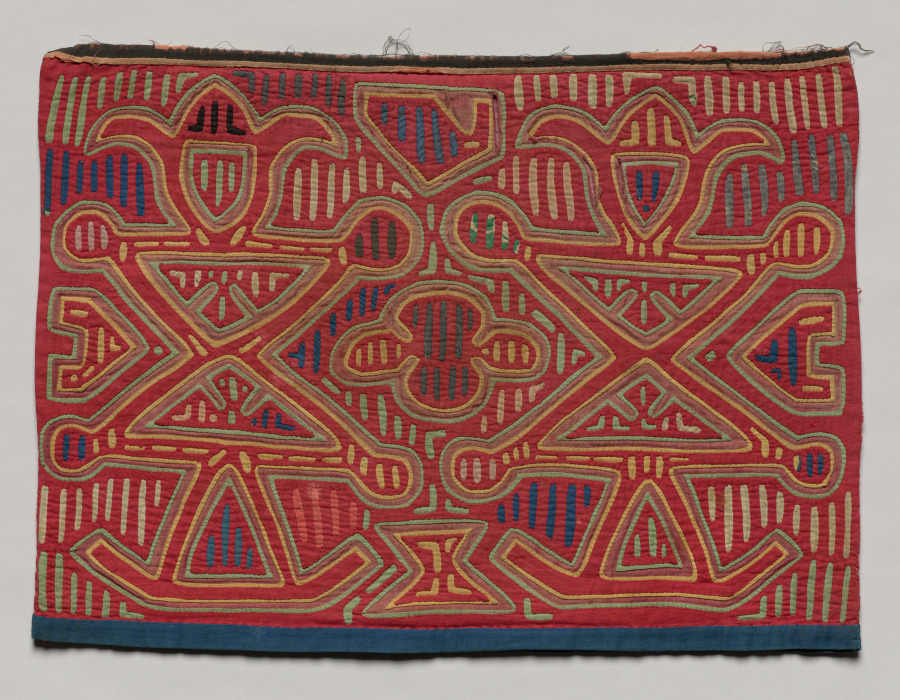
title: Mola Panel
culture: Republic of Panamá, Gunayala Comarca, Guna people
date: 1900s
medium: cotton, reverse appliqué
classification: Textile